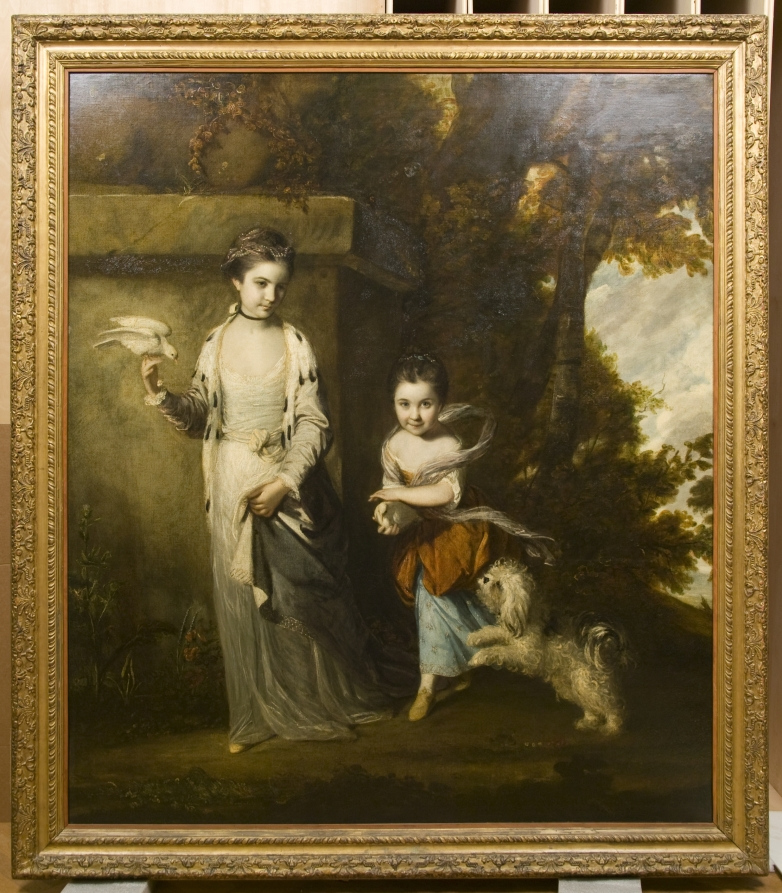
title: Portrait of the Ladies Amabel and Mary Jemima Yorke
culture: England, 18th century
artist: Joshua Reynolds (British, 1723–1792)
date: c. 1761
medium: oil on canvas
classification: Painting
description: Sisters Amabel (left) and Mary Jemima are shown playing on the grounds of their family’s country estate outside London. They wear loose, flowing garments invented specifically for the portrait rather than their usual outdoor dresses. Their father commissioned the painting to hang in the family’s city home in London’s St. James Square and it highlights their status as landowners. Joshua Reynolds painted this portrait after his return from Italy, where his studies inspired him to incorporate classical references. The famous ancient Roman Statue of a Girl with a Dove is echoed in Mary Jemima’s pose as she shields a dove from the family dog.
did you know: Her family affectionately referred to Mary Jemima (at right) as "Mouse."